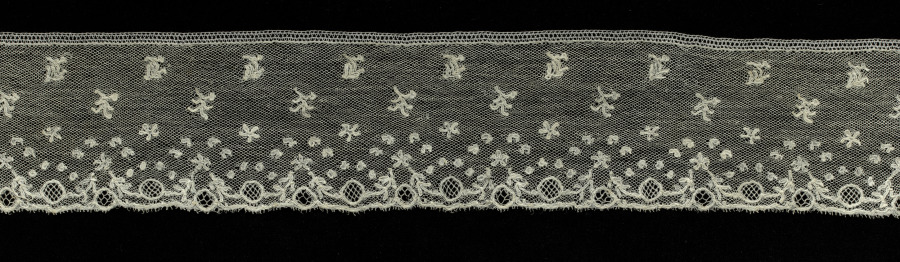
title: Lace Edging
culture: Italy, Burano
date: 1700s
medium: Linen: needle lace (Burano Point)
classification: Lace